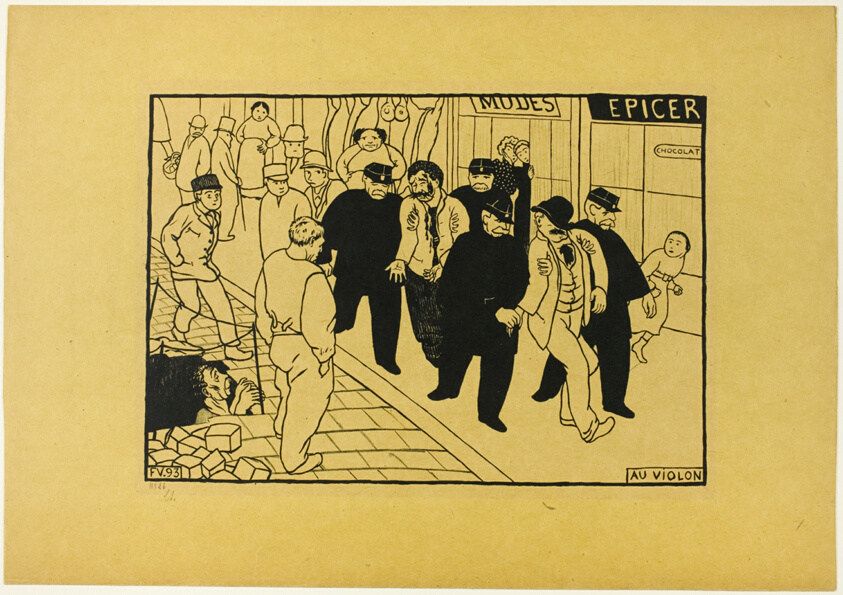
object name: Print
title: Off to the Jug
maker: Félix Edouard Vallotton (French, born Switzerland, 1865-1925)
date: 1893, published 1894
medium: Zincograph in black on dark yellow wove paper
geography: France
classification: zincograph; lithograph; print; prints and drawing